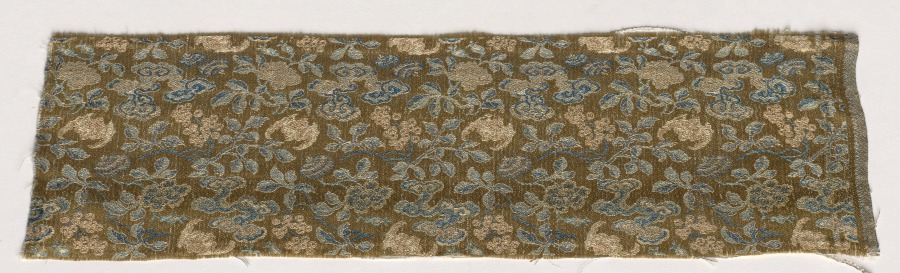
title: Fragment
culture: China, 18th century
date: 1700s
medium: satin ground; silk diasper weave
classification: Textile